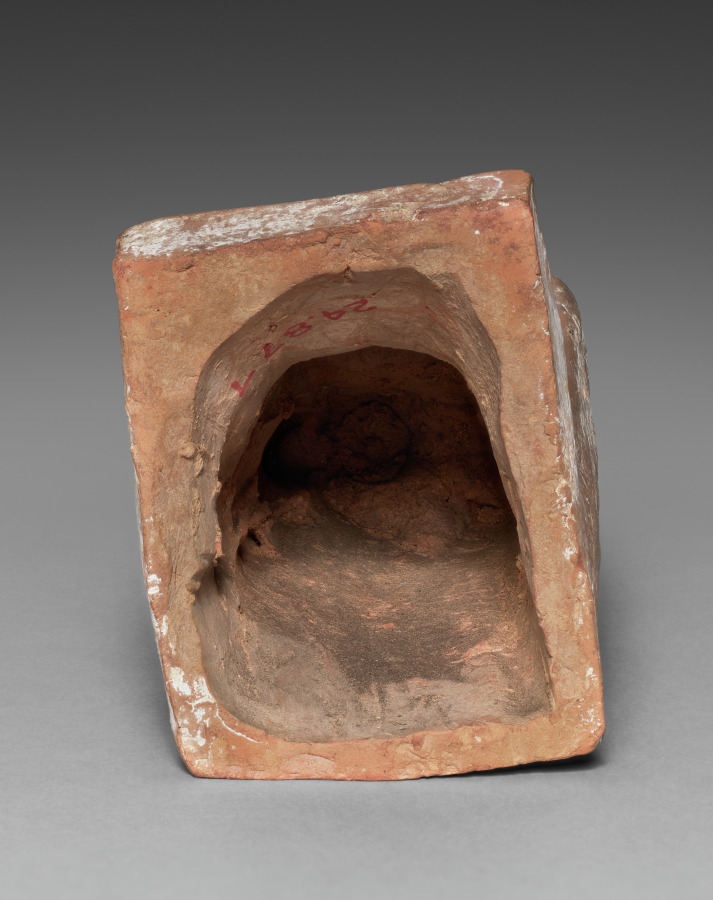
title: Archaic Figurine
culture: Greece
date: 500s BCE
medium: terracotta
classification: Sculpture